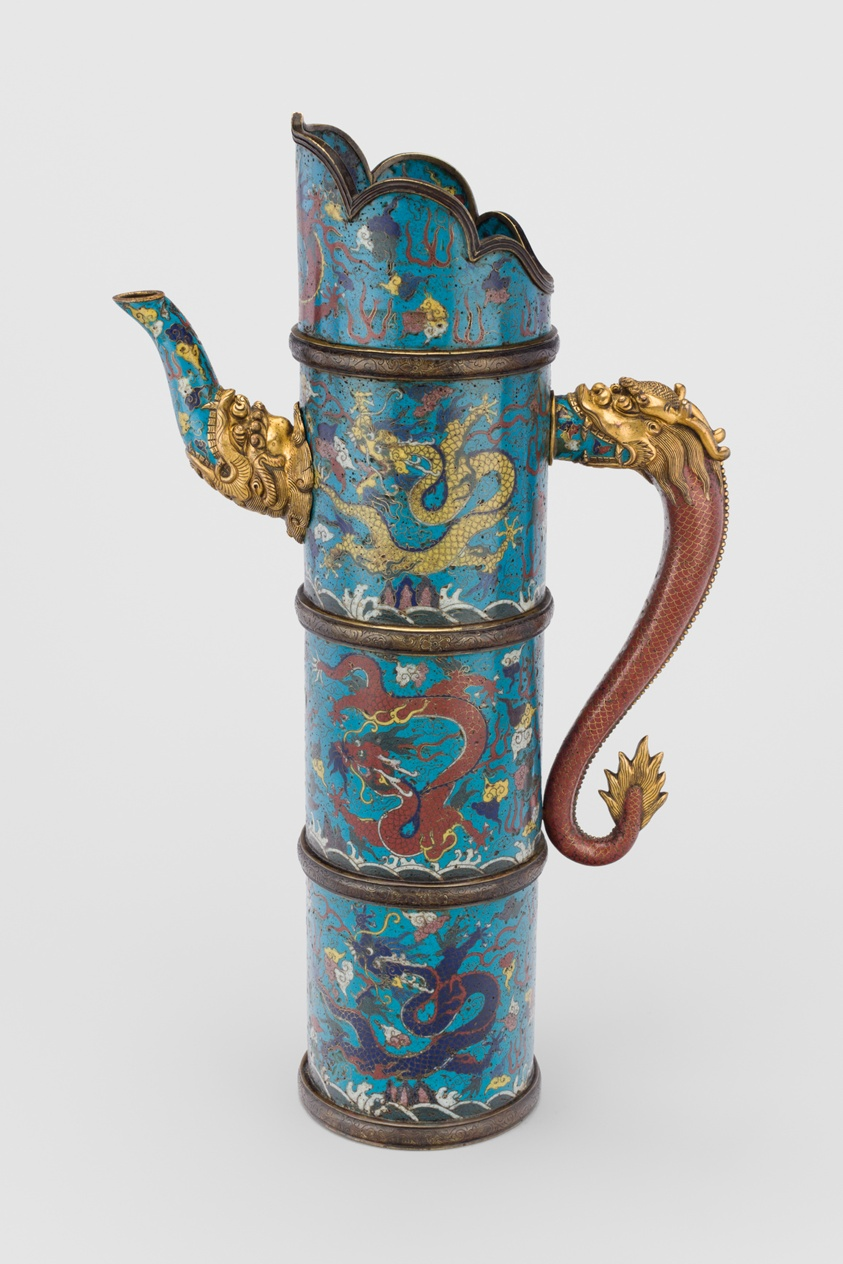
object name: Vessel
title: Enamel Ewer (duomuhu)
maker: Chinese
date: Late Ming/early Qing dynasty, 17th century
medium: Gilt bronze and cloisonné enamel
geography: China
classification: asian art; vessel; ewer (vessel)